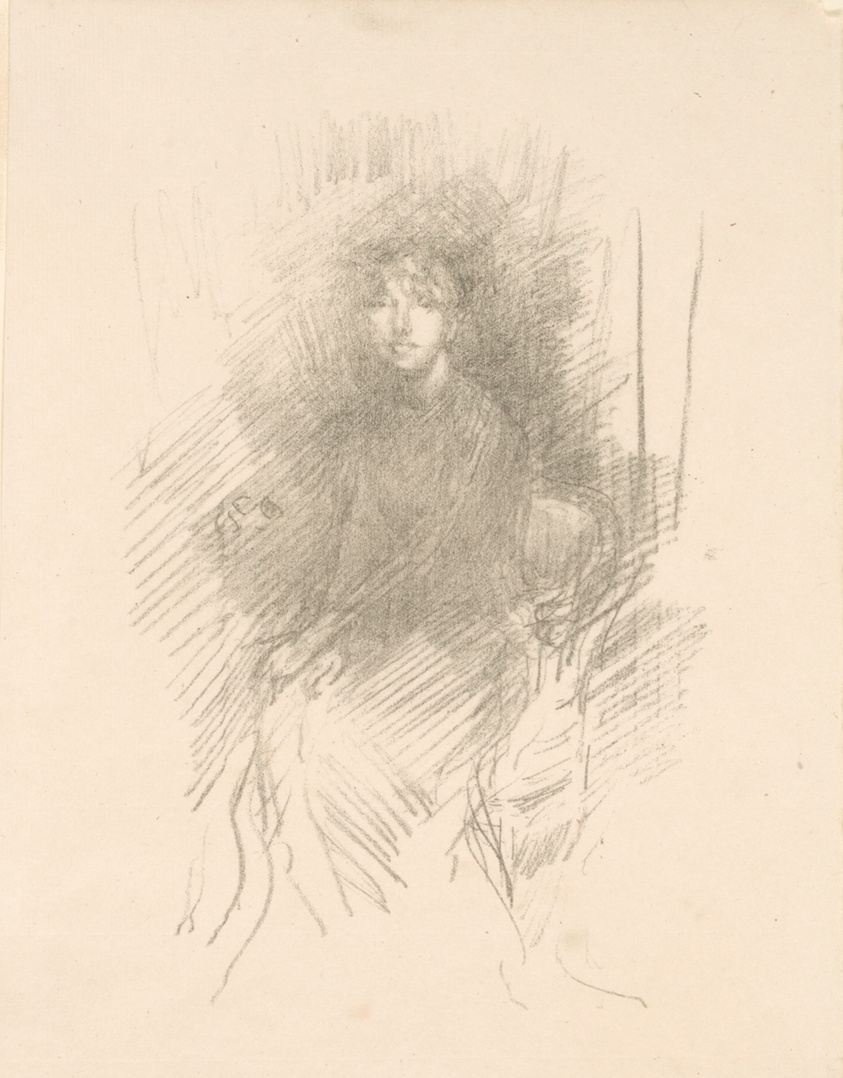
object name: Print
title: Portrait of a Young Woman [Miss Seton]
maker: James McNeill Whistler (American, 1834-1903)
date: 1897 (only printed posthumously 1903)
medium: Transfer lithograph in black ink on cream laid paper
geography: United States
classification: print; transfer lithograph; lithograph; prints and drawing; paper